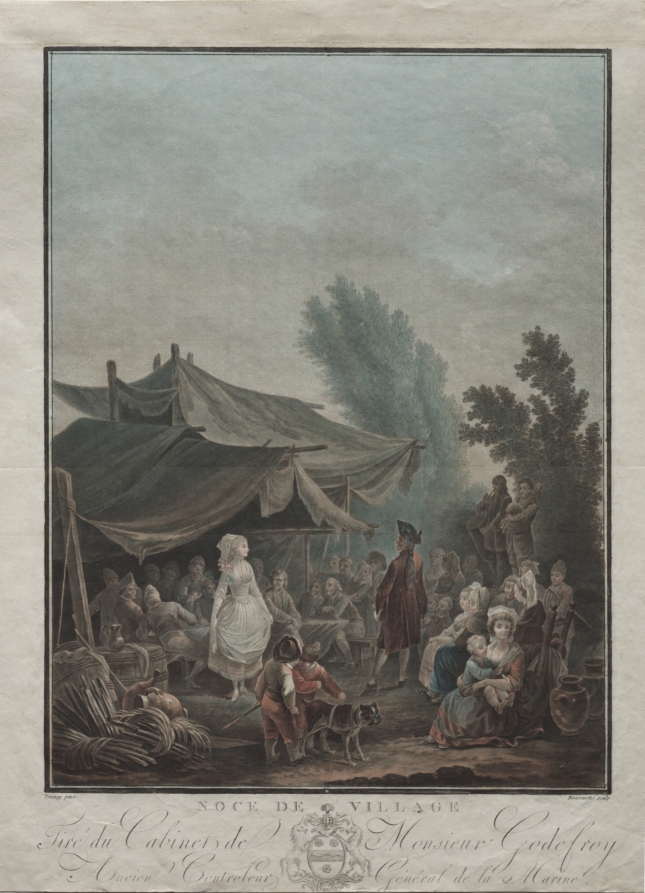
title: Village Wedding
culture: France, late 18th century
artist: Charles-Melchior Descourtis (French, 1753–1820)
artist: after Nicolas Antoine Taunay (French, 1755–1830)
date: 1785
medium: Lavis-manner color engraving and etching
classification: Print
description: Charles-Melchior Descourtis used the same technique as Jean-François Janinet to create passages of tone with almost no traces of tool work. He also superimposed a limited number of colors—yellow, red, blue, carmine, and black—to produce a variety of tints.